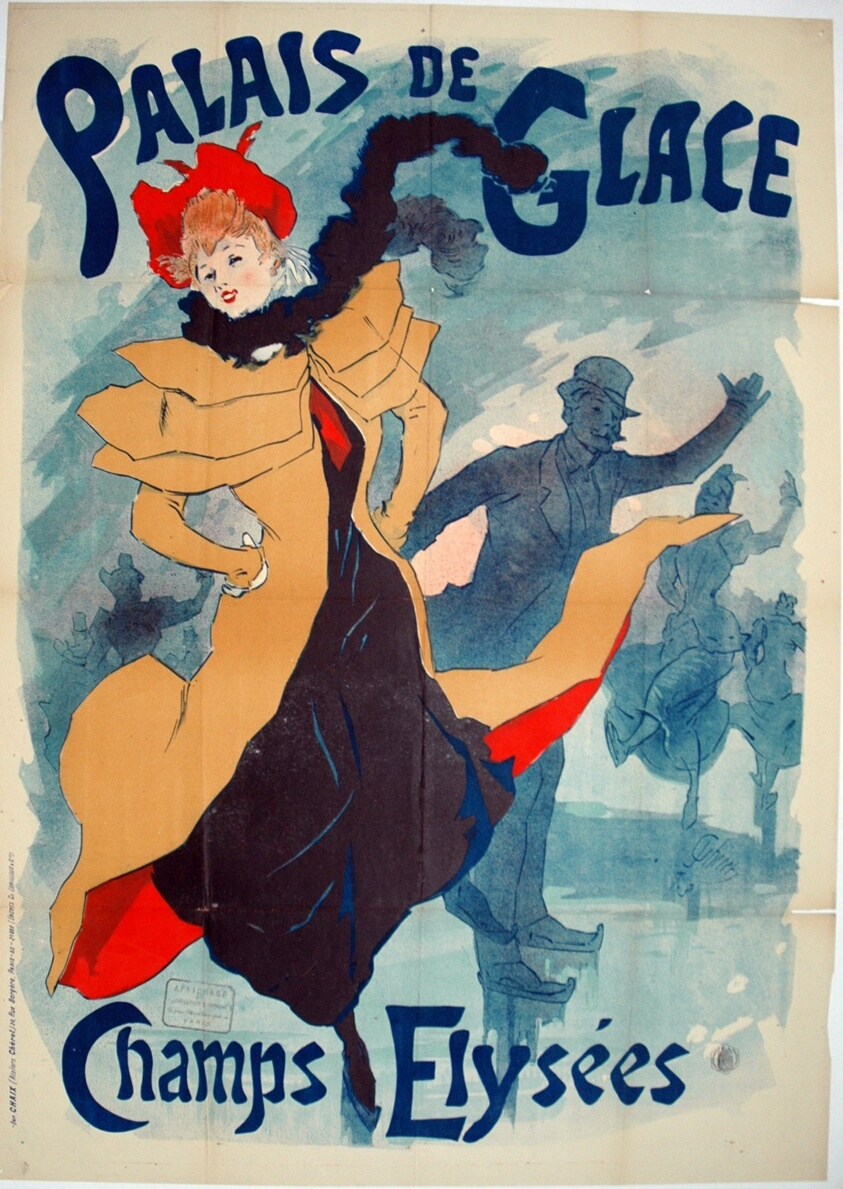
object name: Print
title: Palais de Glace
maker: Jules Chéret, (French, 1836-1932); printed by Imprimerie Chaix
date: 1891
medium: Color lithograph on cream wove paper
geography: France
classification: lithograph; print; prints and drawing